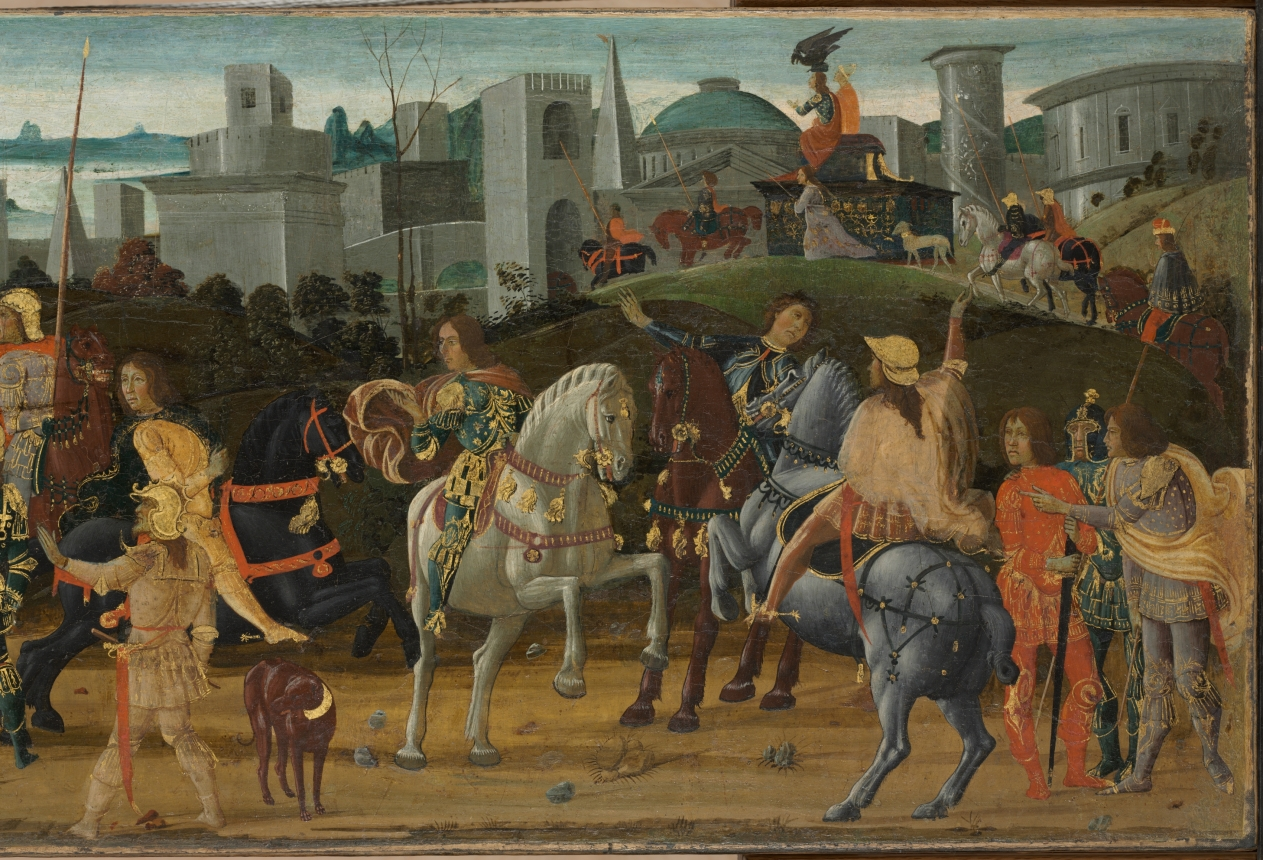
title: Tarquinius Priscus Entering Rome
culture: Italy, late 15th Century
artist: Jacopo del Sellaio (Italian, c. 1441–1493)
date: c. 1470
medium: tempera on wood, mounted on canvas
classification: Painting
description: Originally the front of a bridal chest, this panel was later removed and framed like a painting. At left, the Etruscan prophetess Tanaquil foresees her husband’s entry into Rome. En route, an eagle snatched his hat, then returned it as they approached the city, which Tanaquil interpreted as a good omen. Ancient triumphal processions, closely connected to ancient sarcophagi, were common subjects for bridal chests. Here Tanaquil is a model for a supportive, dutiful wife.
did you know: This painting utilizes continuous narrative; the same figures appear multiple times as the story unfolds from left to right.